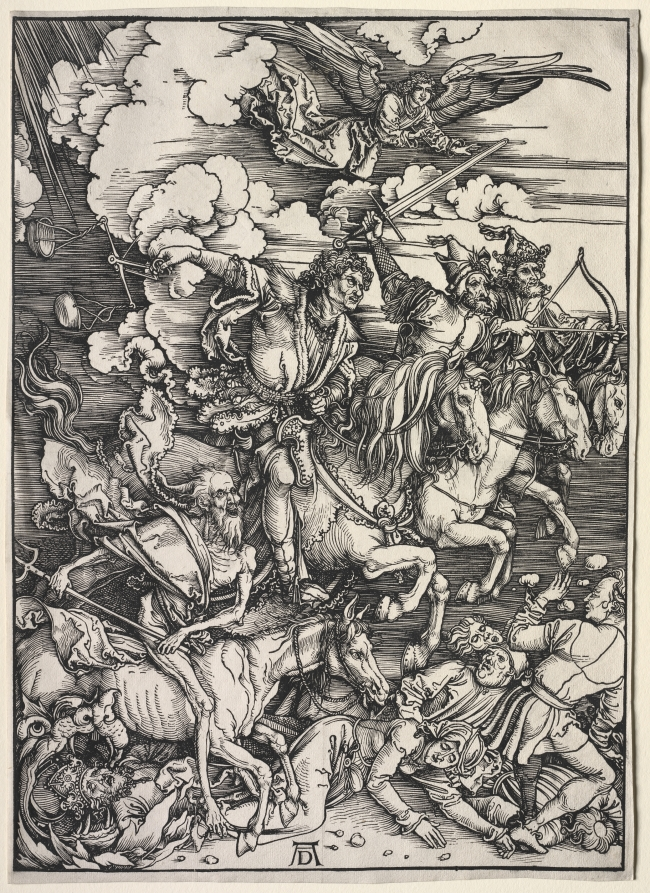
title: The Four Horsemen, from The Apocalypse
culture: Germany, late 15th-early 16th Century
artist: Albrecht Dürer (German, 1471–1528)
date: c. 1498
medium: woodcut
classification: Print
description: In 1498 Dürer published a book illustrating the Revelation of John or the Apocalypse of John, the last book of the New Testament. The images were unique in their large scale, breadth of concept, and unity of design. The first book to be both published and illustrated by the artist, it comprised a title page and 15 full-sheet woodcuts featuring text on the verso of all the sheets except the last one. Often visible through the paper, the text mars the image on the recto of the sheet. The finest impressions were most often printed without text, like this one of The Four Horsemen. Here, Dürer suggested the vigorous momentum of the horsemen through the windblown clothing of the riders, the windswept clouds, and the figures trampled beneath the hooves of the approaching horses.